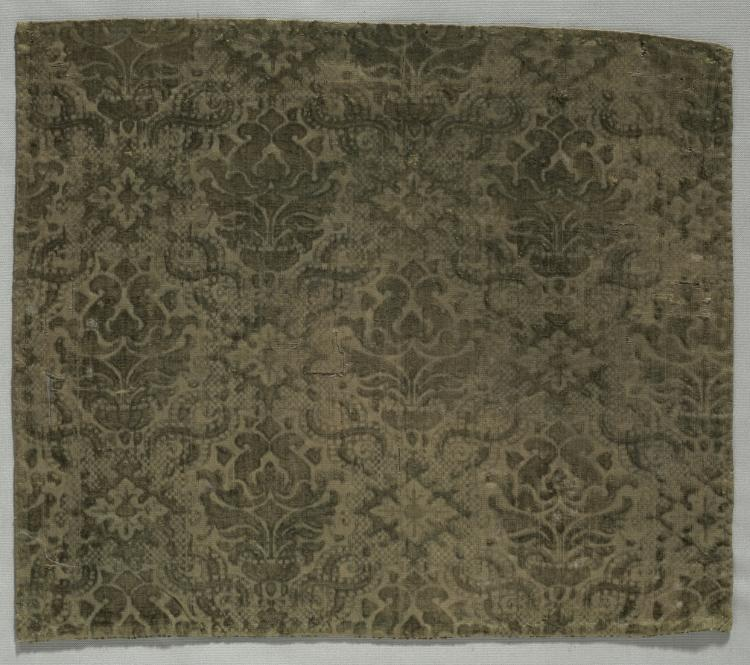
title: Velvet Fragment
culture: Italy, 17th century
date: 1600s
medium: velvet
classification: Velvet